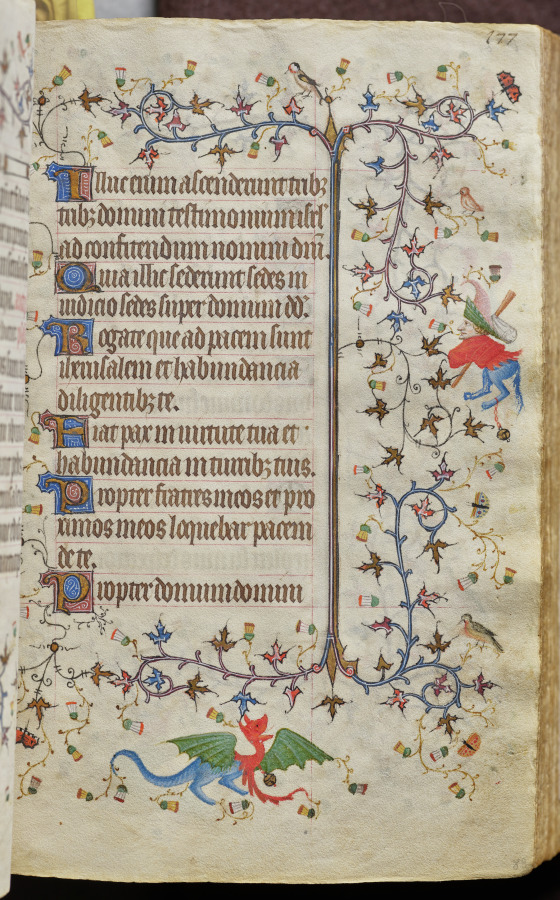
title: Hours of Charles the Noble, King of Navarre (1361-1425): fol. 89r, Text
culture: France, Paris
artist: Master of the Brussels Initials and Associates (French)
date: c. 1405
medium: ink, tempera, and gold on vellum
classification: Bound Volume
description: This precious volume was obviously highly prized by its owner, the French-born King of Navarre, who had his coat of arms painted on no less than twenty folios. Rather than directly commissioning this manuscript from a specific workshop, it seems that Charles the Noble acquired his book of hours -- perhaps ready-made for the luxury market -- while on a trip to Paris in 1404-05. A collaborative effort, six painting styles are evidenced within the pages of this codex, those of two Italians, two Frenchmen, and two Netherlanders. The painter who was responsible for the planning and decoration of the book, and who produced seventeen of the large miniatures, was a Bolognese artist known as the Master of the Brussels Initials. His principal assistant, responsible for most of the borders, was a Florentine who signed his name "Zecho" da Firenze on folio 208 verso.